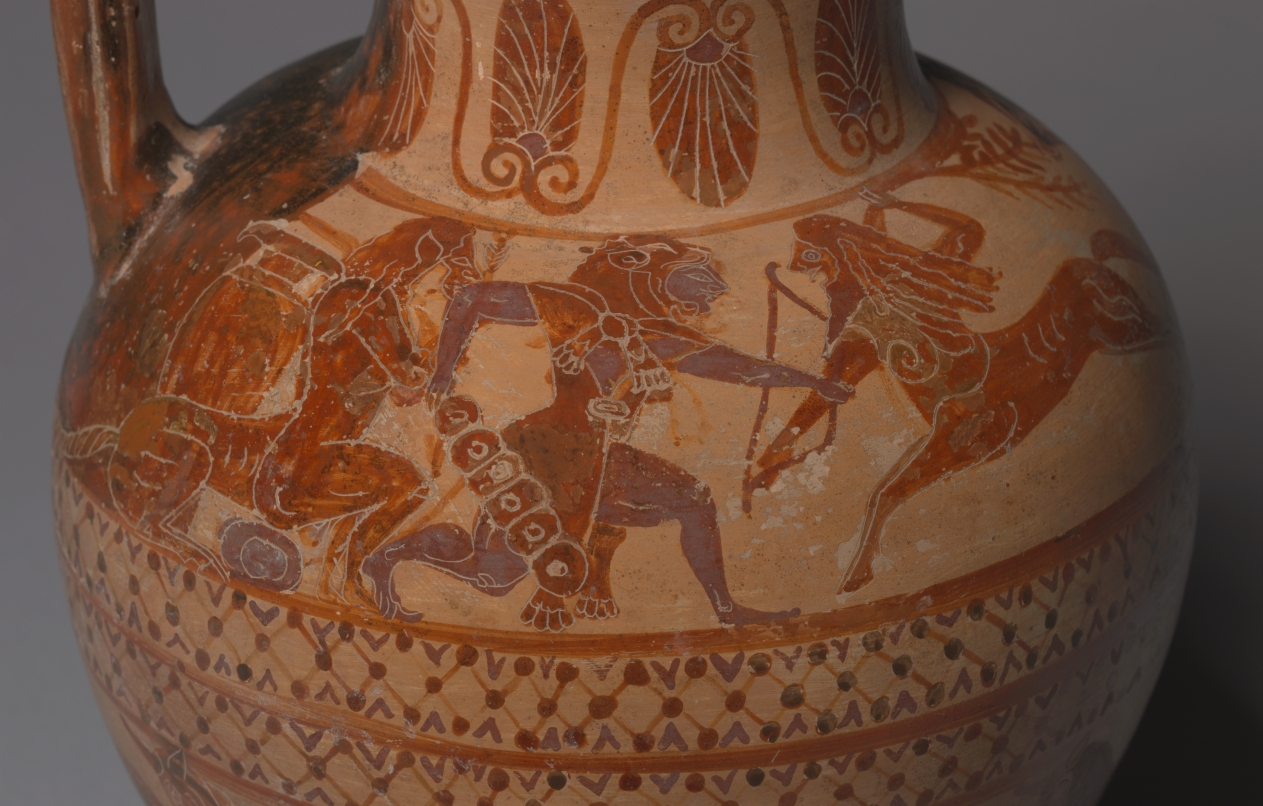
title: Black-Figure Oinochoe (Wine Jug): Hercle (Herakles) and Pholos; Cattle (of Geryon?)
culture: Etruscan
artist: attributed to Tityos Painter (Etruscan, active at Vulci c. 530–510 BCE)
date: c. 520 BCE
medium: ceramic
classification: Ceramic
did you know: This oinochoe or wine pitcher is a type of pottery made by the Etruscans or pre-Italic peoples.